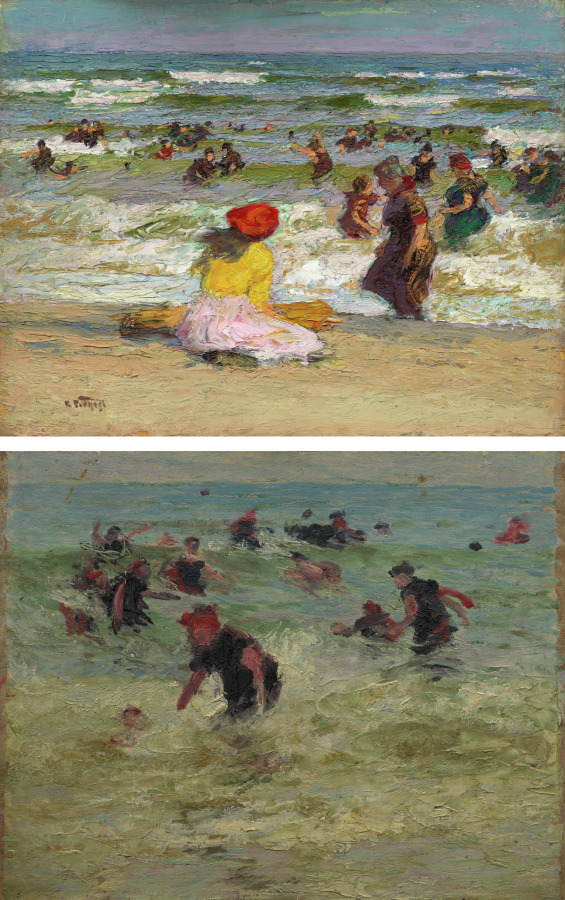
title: In the Surf (recto); Beach Study (verso)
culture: America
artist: Edward H. Potthast (American, 1857–1927)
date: c. 1910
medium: oil on panel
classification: Painting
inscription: recto bottom left: E Potthast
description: Born in Cincinnati, Potthast studied in Munich and Paris before returning to the United States, where he began spending summers along the coast of New England. There he studied the carefree seaside activities of bathers and picnickers. Although he never married, he was particularly fond of painting young mothers and their children.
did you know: During the early 1900s, modesty dictated women’s bathing suit designs featuring long, loose-fitting skirts.